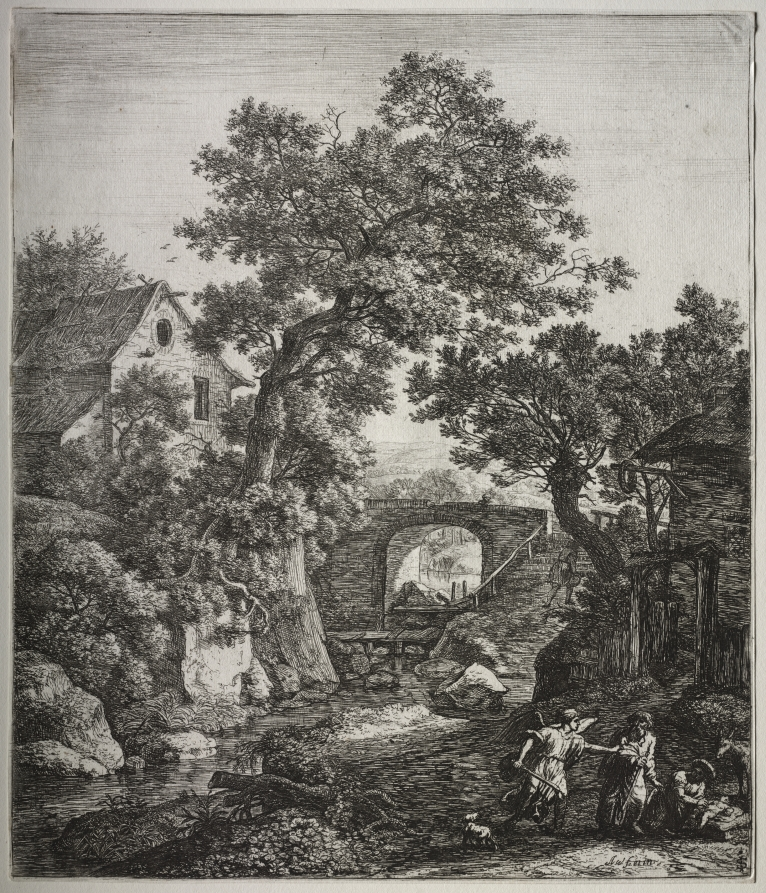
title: Six large upright landscapes with scenes from the Old Testament: Zipporah circumcising Her Son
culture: Netherlands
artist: Anthonie Waterloo (Dutch, 1609/10–1690)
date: 1640–90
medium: etching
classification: Print